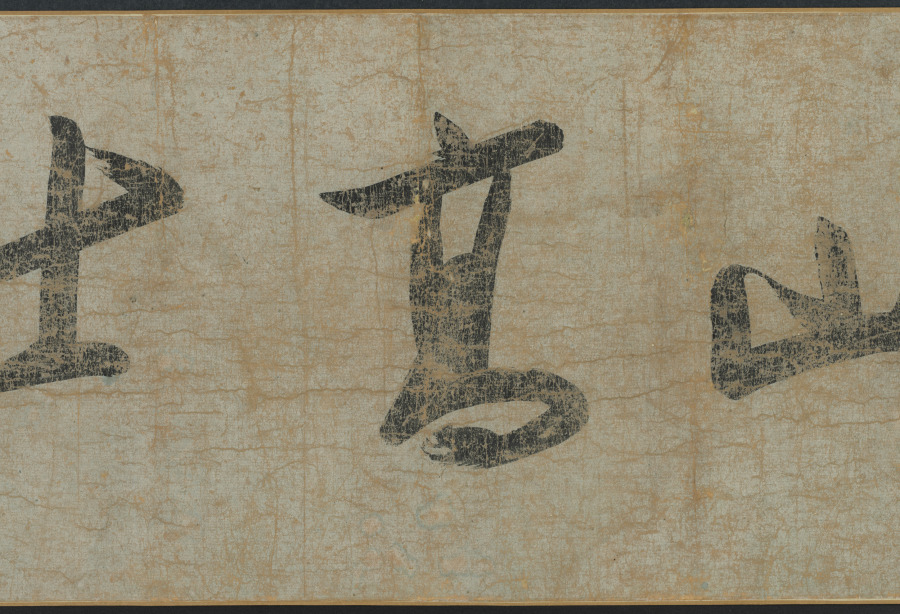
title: Scholar-Hermits in the Autumn Mountains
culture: China, Ming dynasty (1368–1644)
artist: Tang Yin (Chinese, 1470–1523)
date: 1500–1510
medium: handscroll, ink and light color on silk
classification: Painting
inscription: Artist's signature and 2 seals at end of scroll: Tang Yin [seals] T'ang Po-hu; T'ang Tzu'wei t'u-shu.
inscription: Title on frontispiece by Li Cho-kung (dates unknown).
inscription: 1 colophon and 11 additional seals: 1 colophon dated 1915 of Wu Tso-hsi (19th-20th c.); 2 seals of Gao Qifeng 高奇峰 (1889–1933); 5 seals of C. C. Wang 王季遷 (1907–2003); 4 seals unidentified.